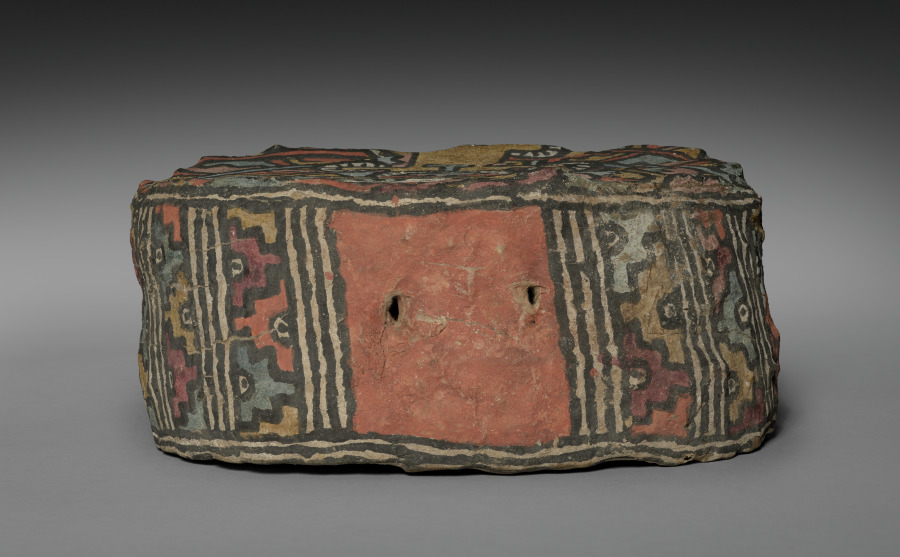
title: Painted Drum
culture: Central Andes, Middle Horizon, North Coast?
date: 500–1000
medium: Animal hide, gesso, wooden slats, pigment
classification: Musical Instrument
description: In the 1600s, music was so important to Indigenous Andean ceremonial life that Spaniards destroyed thousands of musical instruments to hasten Natives’ conversion to Christianity. The number of surviving, older instruments suggests that music had similar import in earlier periods. This rare example is painted with a figure wearing a crescent headdress, an emblem of status; it may have been played by a woman.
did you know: This painted drum may have been played by a woman in antiquity.